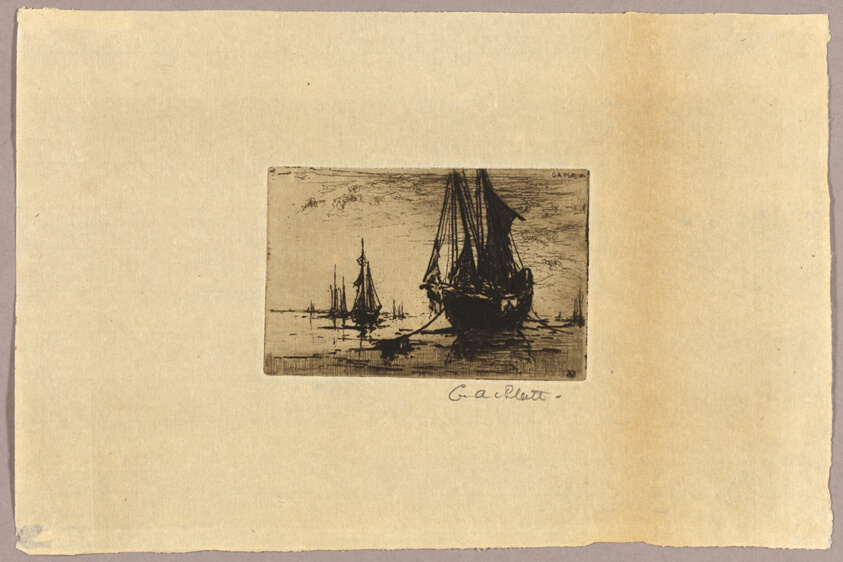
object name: Print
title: Sketch of a Boat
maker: Charles Adams Platt (American, 1861-1933)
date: 1881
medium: Etching in black on tan laid China paper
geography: United States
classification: etching; print; prints and drawing